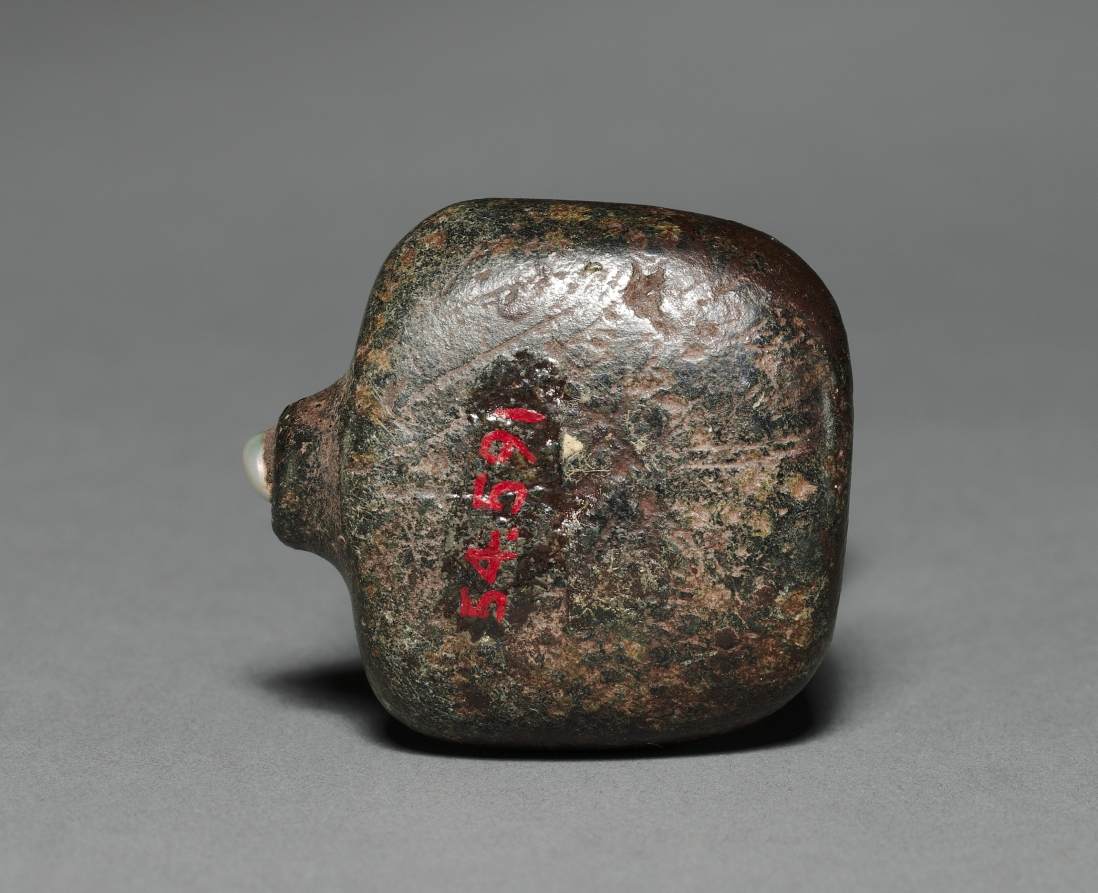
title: Pelican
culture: America, North American Indian, Channel Islands, Island of San Nicolas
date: 1800s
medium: stone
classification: Sculpture